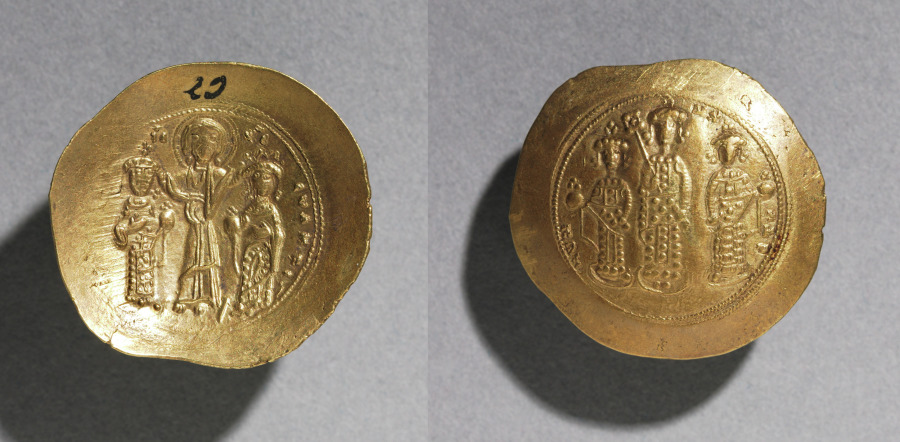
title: Nomisma with Eudocia and Romanus IV Diogenes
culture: Byzantium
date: 1068–1071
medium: gold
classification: Coins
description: Byzantine Gold Coins The vast number of surviving Byzantine coins attests to the level of trade across the empire. Controlled and supervised by the emperor, the producers of coins took care to represent his authority and reflect his stature. Talented artists were recruited to engrave the dies (molds) used for the striking of coins. Emperors increasingly came to include their heirs and co-emperors on their coinage, as well as other family members or even earlier rulers. Coins were recognized, then as now, as small, portable works of art. With their inscriptions and images, Byzantine coins provide valuable documentation of historical events and a record of the physical appearance of the emperors. The coins shown here include the solidus, the basic gold coin of 24 karats; the tremissis, a gold coin of one-third the weight and value of the solidus; and the nomisma, which in the 10th century replaced the solidus as the standard gold coin.